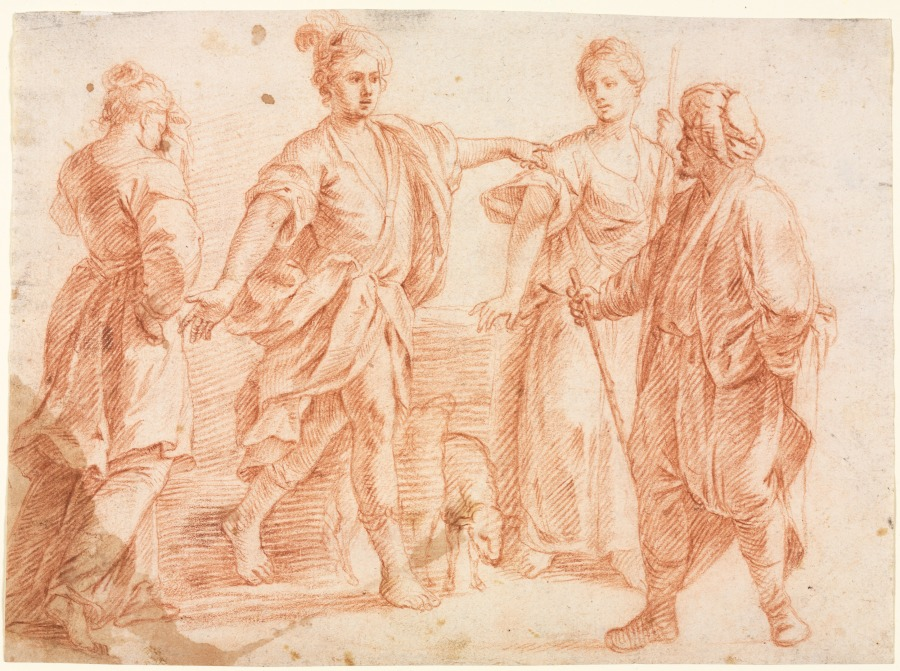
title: Jacob and Laban with Rachel and Leah (recto); Sketch of Two Men and Other Various Figures (verso)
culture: Italy, Bologna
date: 1600s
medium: red chalk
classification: Drawing